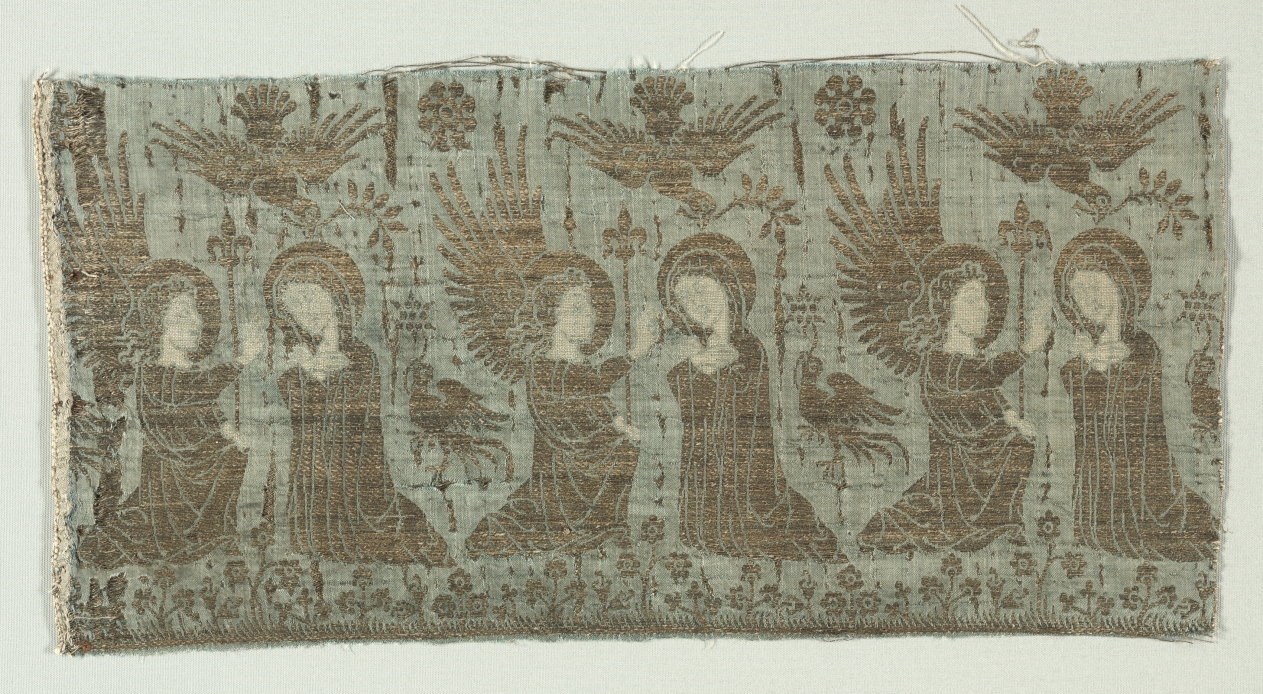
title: Textile Fragment with the Annunciation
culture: Italy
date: 1370–1400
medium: Silk with gold thread; lampas weave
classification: Textile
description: The motif shown here depicts the Virgin Mary and the angel Gabriel in a repeating sequence. Both figures kneel above a bed of flowers while a dove representing the Holy Ghost hovers above. The ground of this luxury silk, woven with highlights of gold thread, is now a faded blue. Its original purpose is not clear, but it may have originally been part of an altar frontal or possibly an ecclesiastical cope, or cape.